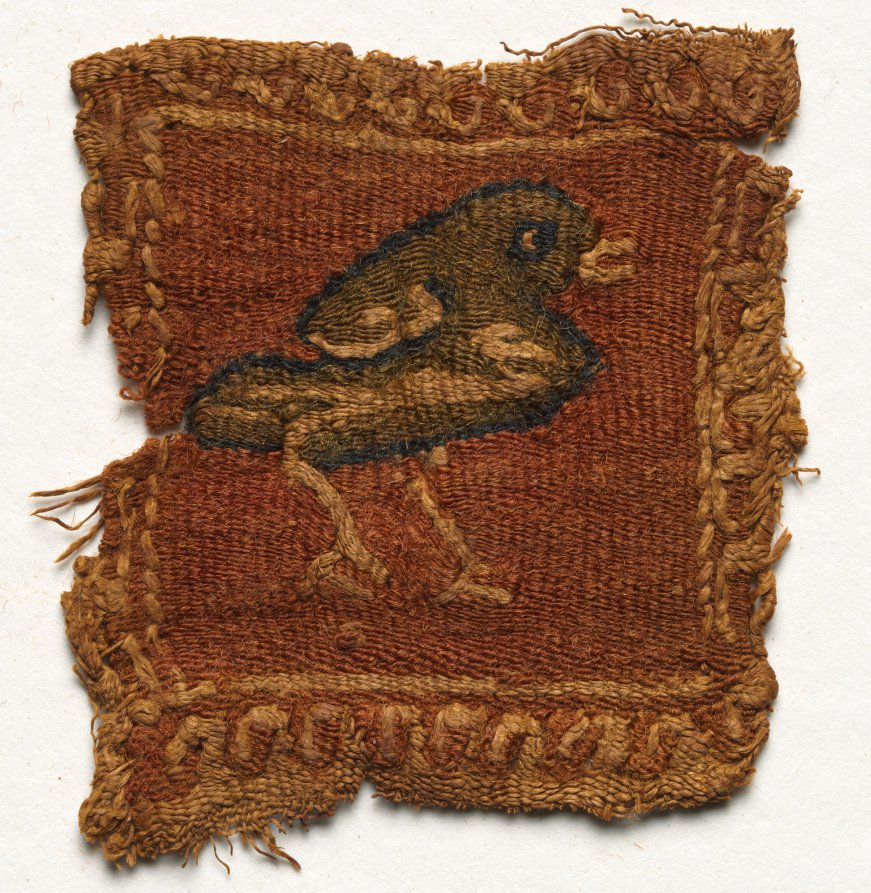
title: Fragment with Roundel and Decorative Stripes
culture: Egypt, Umayyad period (661–750)?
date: 600s - 700s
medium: tabby weave with inwoven tapestry ornament, linen and wool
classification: Textile